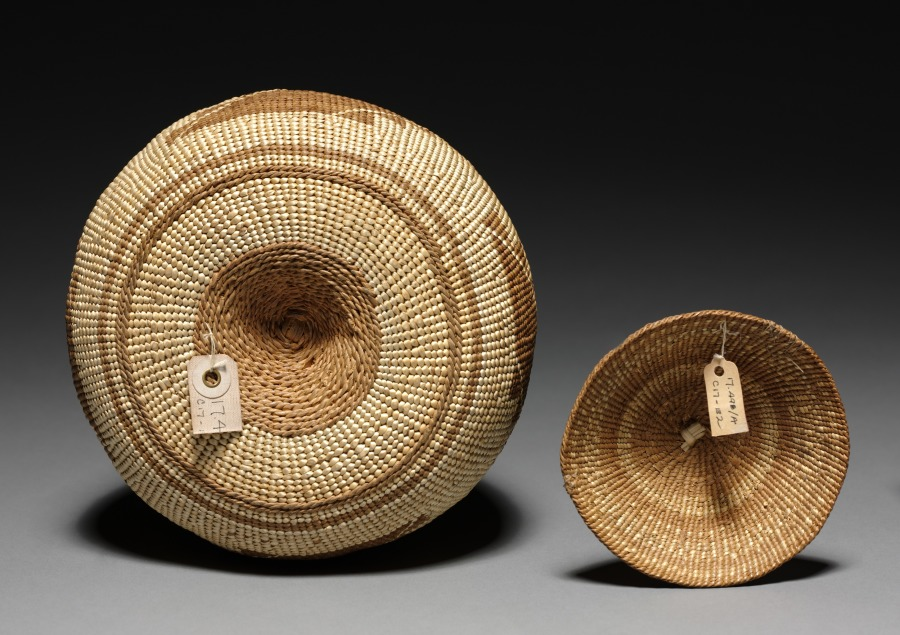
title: Tobacco Basket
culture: California, Yurok, late 19th century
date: c 1875– 1900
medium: twined grasses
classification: Basketry